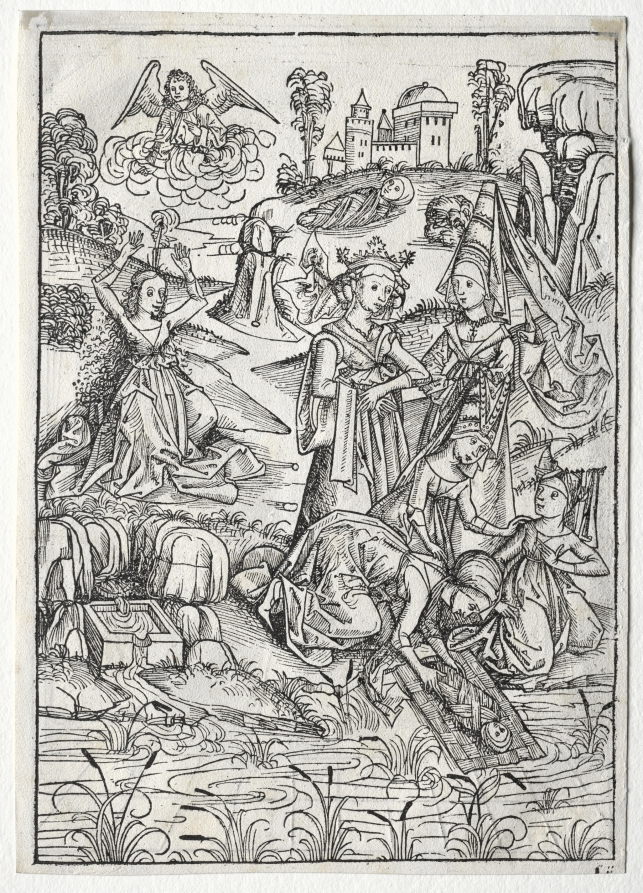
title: Der Schatzbehalter: Moses Found by Pharaoh's Daughter (recto)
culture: Germany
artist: Michael Wolgemut (German, 1434–1519)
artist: Wilhelm Pleydenwurff (German, 1450–1494)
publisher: Anton Koberger (German, 1435-1513)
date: 1491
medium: woodcut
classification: Print